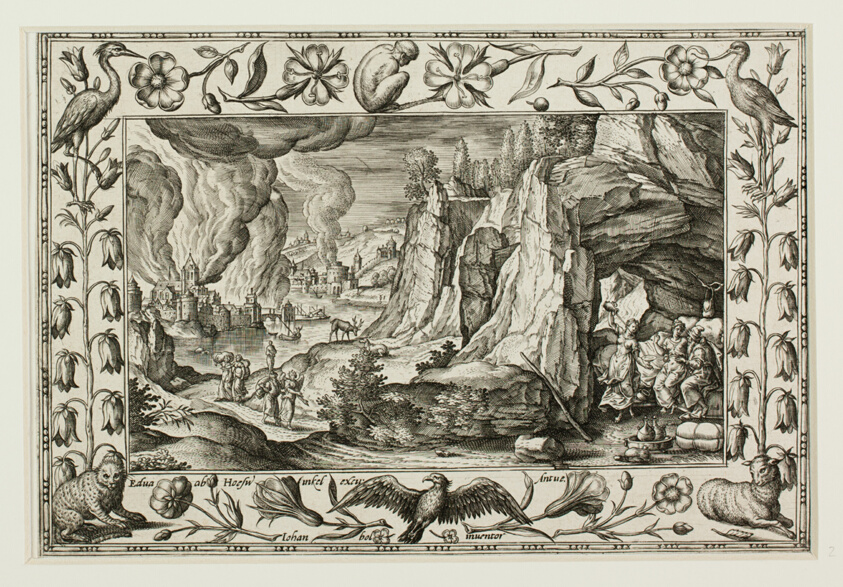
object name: Print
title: Lot and His Daughters, from Landscapes with Old and New Testament Scenes and Hunting Scenes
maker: Adriaen Collaert (Flemish, c. 1560–1618); after Hans Bol (Flemish, 1535–1593); published by Anna van Hoeswinckel (Flemish)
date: 1584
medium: Engraving in black on cream laid paper, laid down on cream laid paper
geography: Flanders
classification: engraving; paper; print; prints and drawing